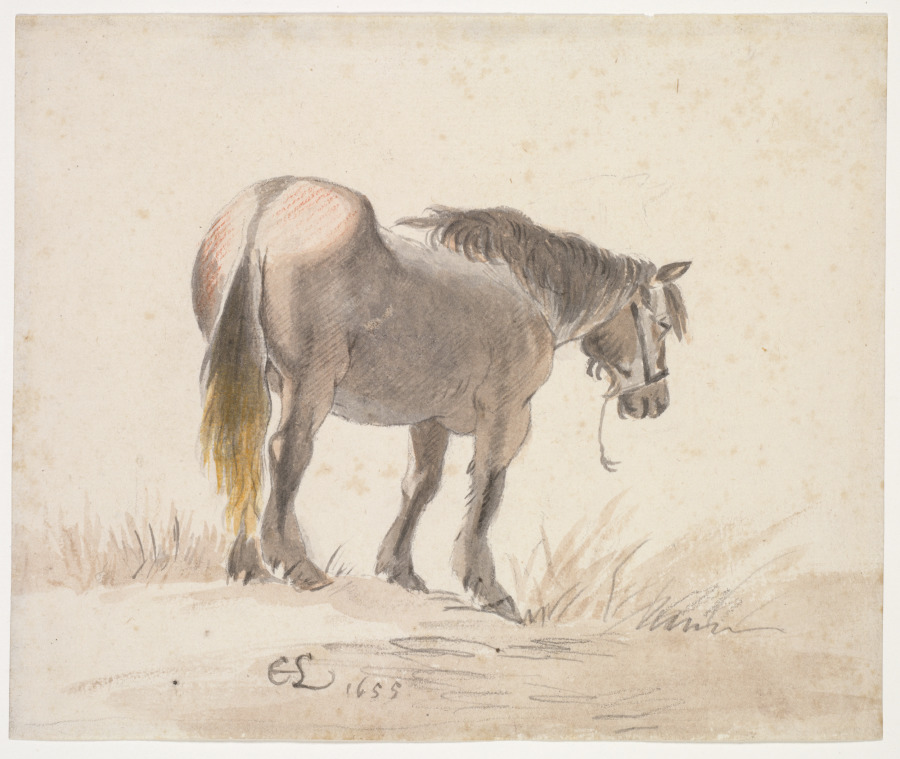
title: Horse Standing on a Mound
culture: Netherlands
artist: Cornelis Saftleven (Dutch, 1607–1681)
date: 1655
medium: brush and black, brown, yellow, and gray watercolors over graphite and red chalk on antique laid paper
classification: Drawing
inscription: Initialed, lower center: CS, 1655 in grey-brown ink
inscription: watermark: Arms of Amsterdam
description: Cornelis Saftleven’s drawing of a horse from the rear is an example of the animal subject matter that was outrageously popular and considered indigenous to the Netherlands in the 17th century. The artist made this drawing for sale, evident by his initials and date at the bottom center of the drawing, and by the drawing’s high degree of finish, combining several different media including yellow watercolor and red chalk. The awkward and nonheroic pose of the horse demonstrates the Dutch taste for everyday scenes and naturalism.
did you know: This Dutch artist specialized in making natural portraits of horses, dogs, and even cows!